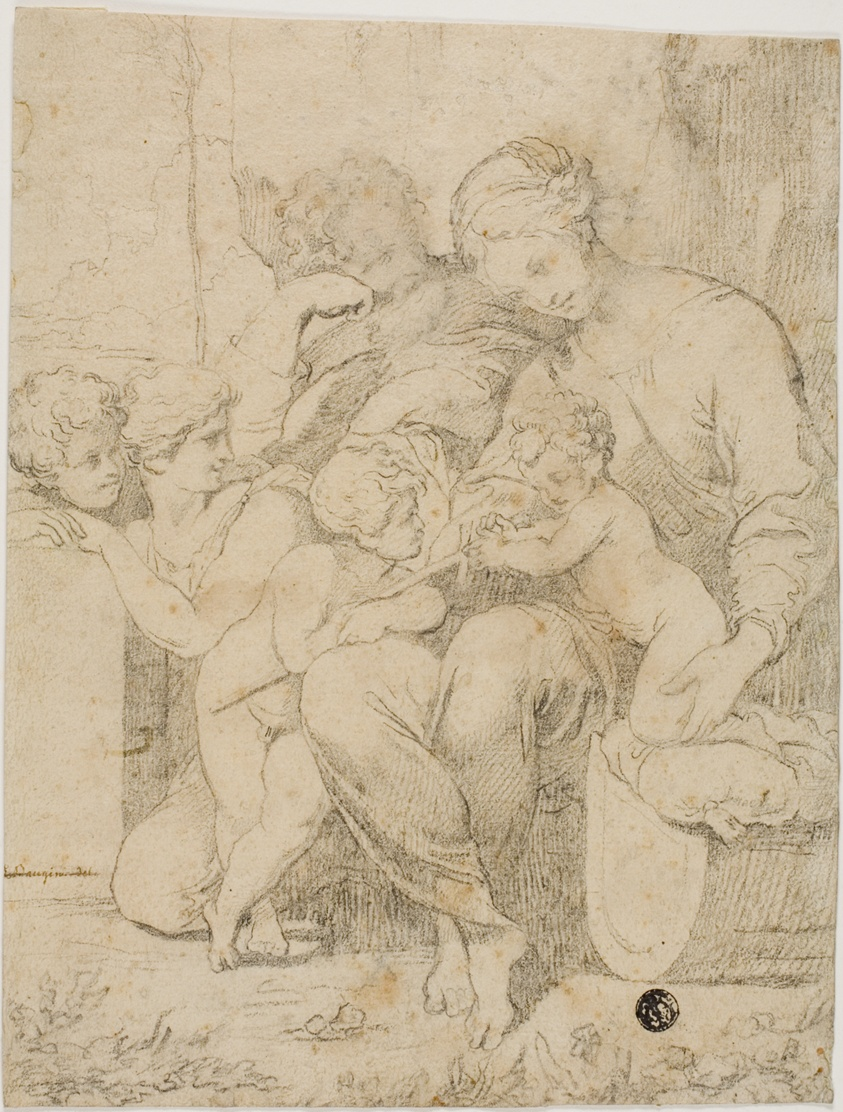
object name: Drawing and Watercolor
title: Holy Family with the Infant Saint John the Baptist and Angels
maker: After Lubin Baugin; French, 1610-1663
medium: Black chalk on cream laid paper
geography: France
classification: chalk; drawings (visual works); prints and drawing